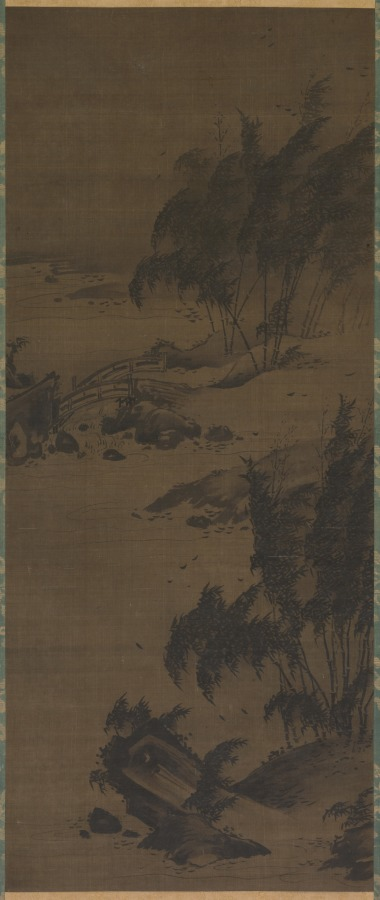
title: Bamboo in Wind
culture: Japan, Muromachi period (1392–1573)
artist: attributed to Genga (Japanese)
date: early 1500s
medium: hanging scroll; ink on silk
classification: Painting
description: East Asian paintings from China, Korea, and Japan were frequently conceived as sets of multiple images. These sets might have been composed for specific palace or temple rooms, or to portray a specific theme, such as the four seasons. Over time, the original intent of such sets is often lost through damage, changes in ownership, or a variety of other reasons. The identity of the artist can also be lost, but then, sometimes, retrieved. This pair of ink paintings has traditionally been labeled as Japanese and attributed to the 16th-century painter Genga. Since there are no seals or signature of the artist on the painting, this attribution was based on comparisons of brush style with paintings known to be by Genga. More recent study indicates that while the 16th century is an appropriate time frame for the pair, the precise cultural identity of the artist is not certain after all. The dark, eccentric shapes of the rocks and bamboo clusters and the dramatic tonal contrasts evident throughout the composition point to either Korean authorship or influence upon a Japanese painter of the period.